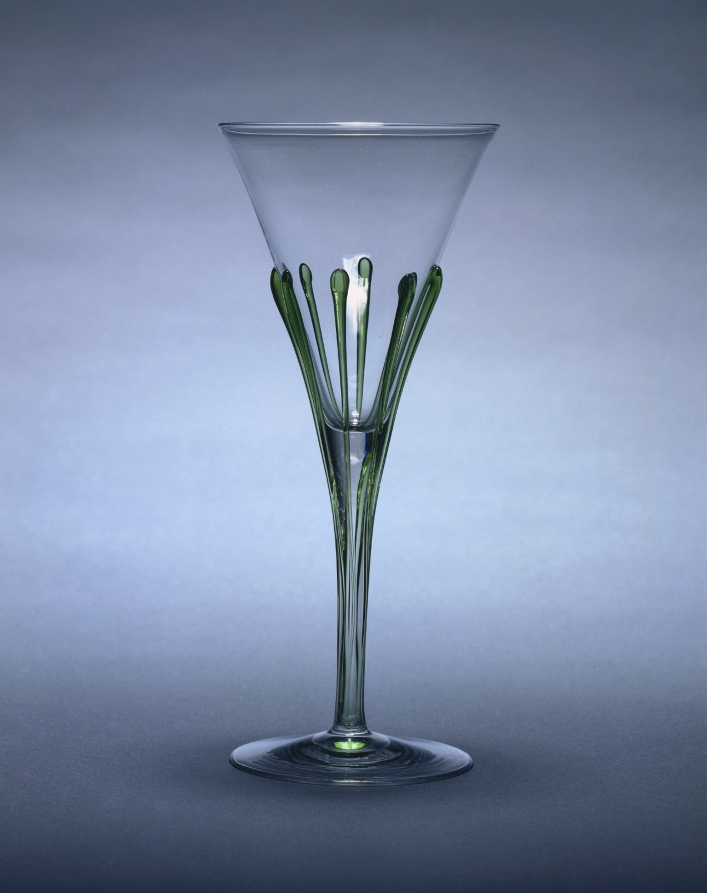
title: Goblet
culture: England, early 20th Century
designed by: Harry Powell (British, 1835–1922)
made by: Whitefriars Glasshouse (British)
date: c. 1900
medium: glass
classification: Glass